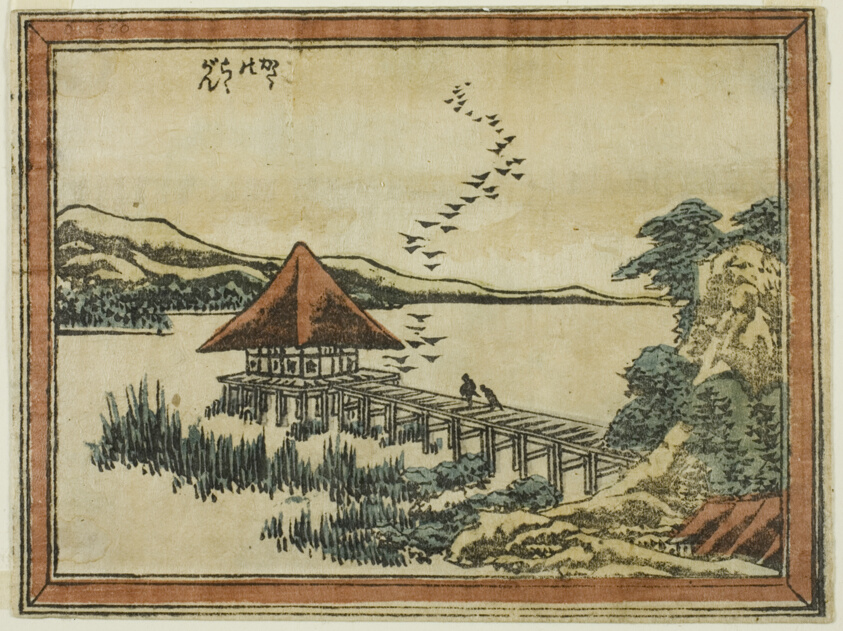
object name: Print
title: Descending Geese at Katada (Katada no rakugan), from the series Eight Views of Omi in Etching Style (Doban Omi hakkei)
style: Japanese (culture or style)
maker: Katsushika Hokusai 葛飾 北斎; Japanese, 1760-1849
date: 1804/16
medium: Color woodblock print; horizontal koban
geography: Japan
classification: woodblock print; print; asian art